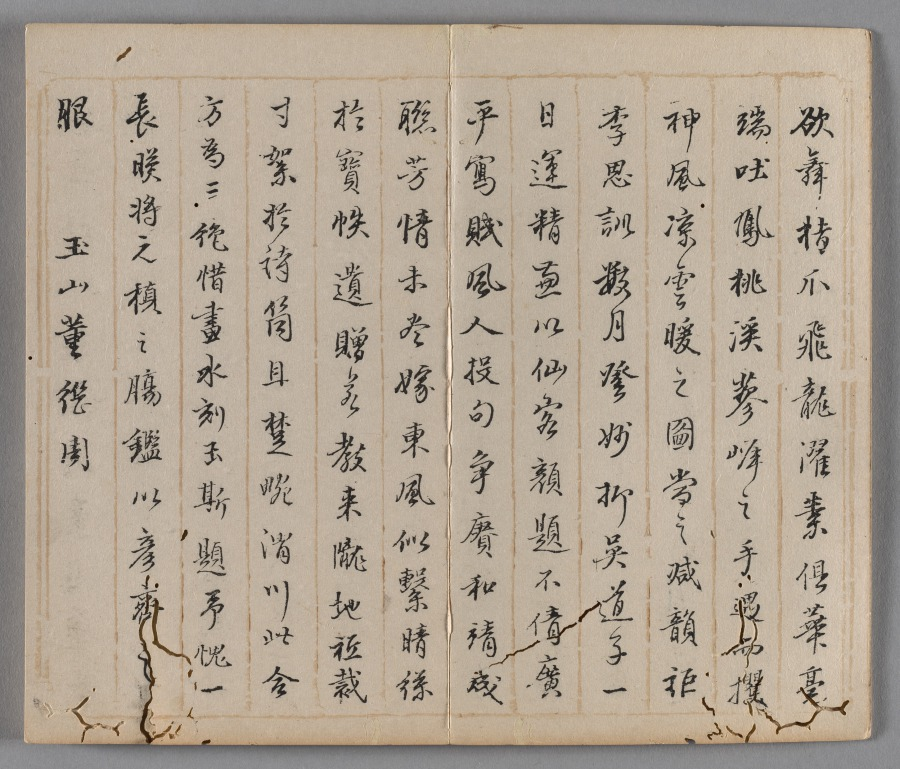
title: Ten Bamboo Studio Painting and Calligraphy Handbook (Shizhuzhai shuhua pu): Plum Blossoms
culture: China, Qing dynasty (1644-1911)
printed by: Hu Zhengyan (Chinese, c. 1584–1674)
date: 1633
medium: Woodblock-printed book; ink and colors on paper; first edition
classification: Print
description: Color printing reached a level of perfection in the early 1600s, as seen in this Ten Bamboo Studio Collection of Calligraphy and Painting and the Mustard Seed Garden Manual of Painting (printed 1679 and 1701). The painterly quality, precision in registering (aligning) the woodblocks, and harmonious colors made them the most successful color print editions in Chinese history. Both editions were printed and compiled in Nanjing, spread nationwide, and had a great impact on the arts in Japan and Korea.